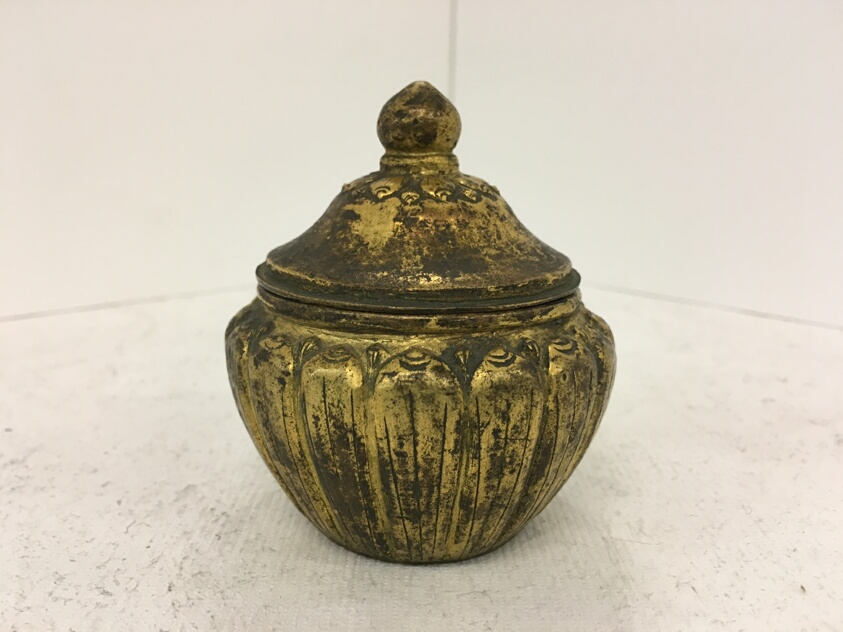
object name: Vessel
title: Ointment Jar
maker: China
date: Five dynasties (907CE-960CE)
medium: Bronze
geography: China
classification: bronze; metal; container; asian art